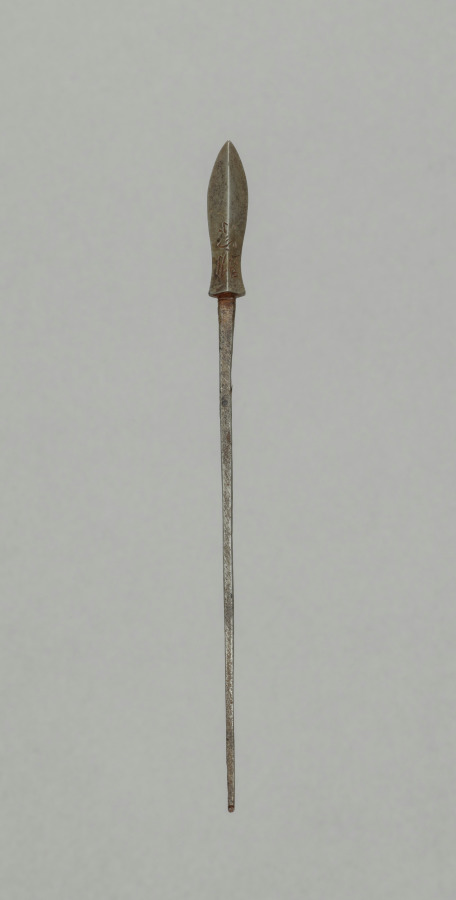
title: Arrow Point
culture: Japan, Edo period (1615–1868)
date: 1700s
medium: steel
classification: Arms and Armor